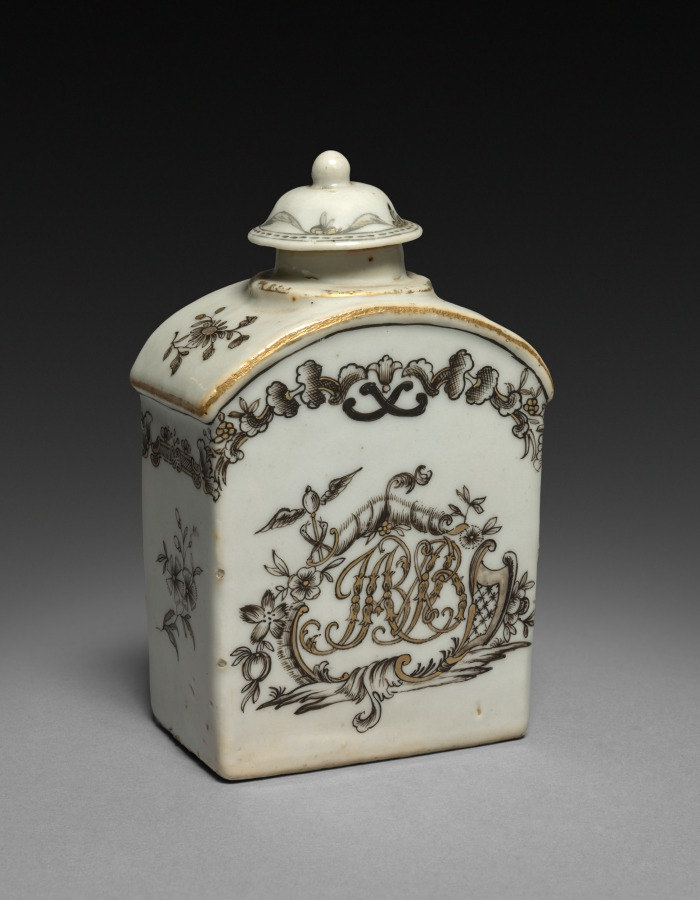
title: Tea Caddy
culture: China, Chinese Export -- European Market, 18th century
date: c. 1750–1770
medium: porcelain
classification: Ceramic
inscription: on body of tea caddy the initials seem to be: "J A B" and "L B" interlaced in a rococo cartouche.